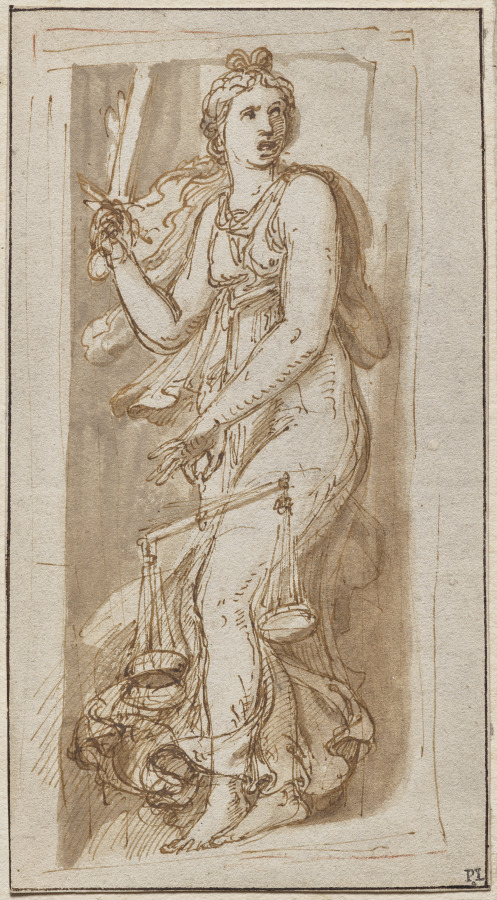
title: Justice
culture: Italy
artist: Giulio Romano (Italian, 1492/99–1546)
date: 1530–34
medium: pen and brown ink and wash within brown ink and red chalk framing lines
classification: Drawing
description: After working in Rome in the 1510s, Giulio Romano became the court artist to Federico II Gonzaga, 1st Duke of Mantua (r. 1530–40), where his universal talents as an architect, designer, and painter transformed the duke’s unadorned Palazzo del Te into an elaborate setting for leisure and courtly activity. It was through drawings that Giulio planned everything from the most important narrative sequences of the palace to the most seemingly insignificant ornamental details. This drawing is preparatory for the frescoed figure of Justice, which appears on the vaulted ceiling of the Camera di Attilio Regolo painted between 1530 and 1534. Justice appeared between narrative scenes that exemplified the moral virtue of ancient military leaders and of the duke.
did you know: Giulio Romano was one of the most gifted students of the painter Raphael, under whom he worked to decorate the papal apartments at the Vatican in the 1510s.